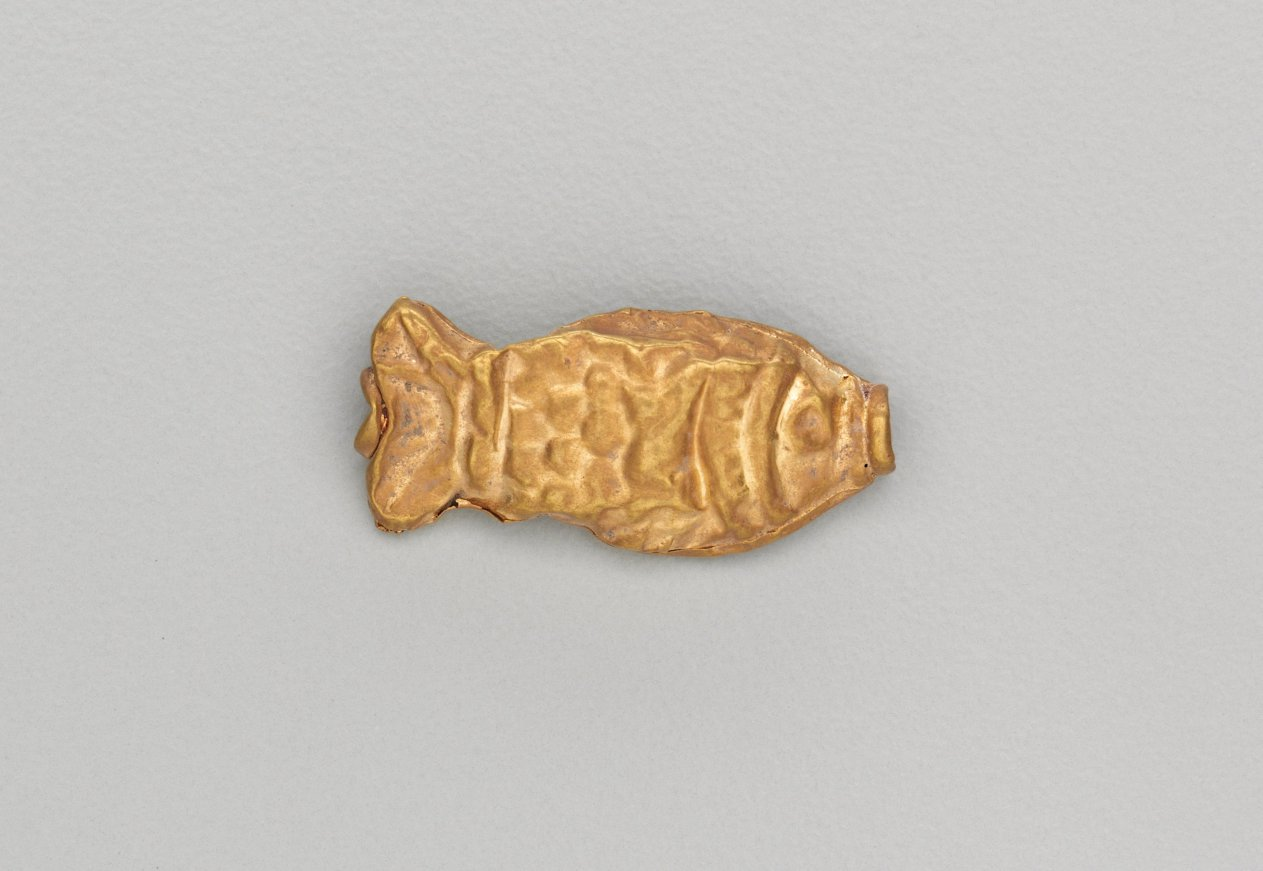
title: Necklace Bead in the Form of a Fish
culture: India, Shunga period (185–78 BCE)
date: 185–72 BCE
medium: gold repoussé with granulation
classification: Jewelry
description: Jewelry in ancient India often consisted of elements associated with water, such as fish and other aquatic plants and animals. Since water is essential for life, imagery that connotes water is life-affirming, or auspicious, and therefore appropriate adornment.